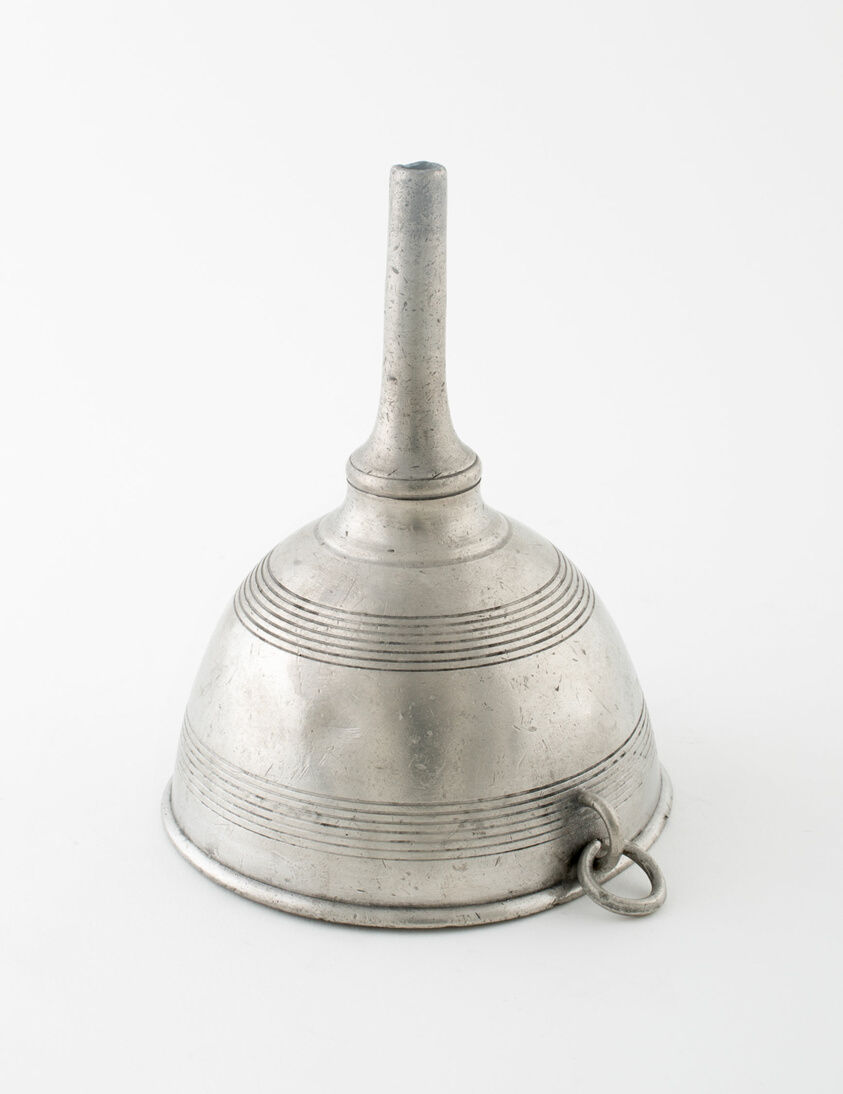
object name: Metalwork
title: Ale or Wine Funnel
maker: Probably England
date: c. 1800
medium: Pewter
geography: England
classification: accessory table equipment; pewter; tableware; metalwork; european decorative arts